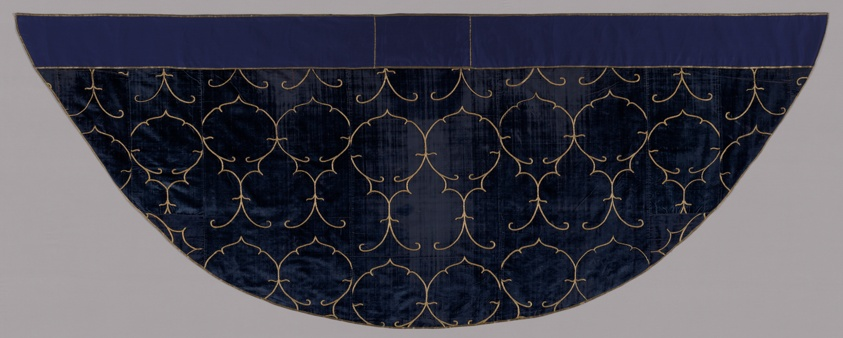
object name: Textile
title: Cope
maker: Probably Spain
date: 1450/1500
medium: Silk cut velvet embroidered with couched gilt-metal-strip-wrapped silk; later additions: orphrey band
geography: Spain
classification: textile; weaving - velvet; liturgical